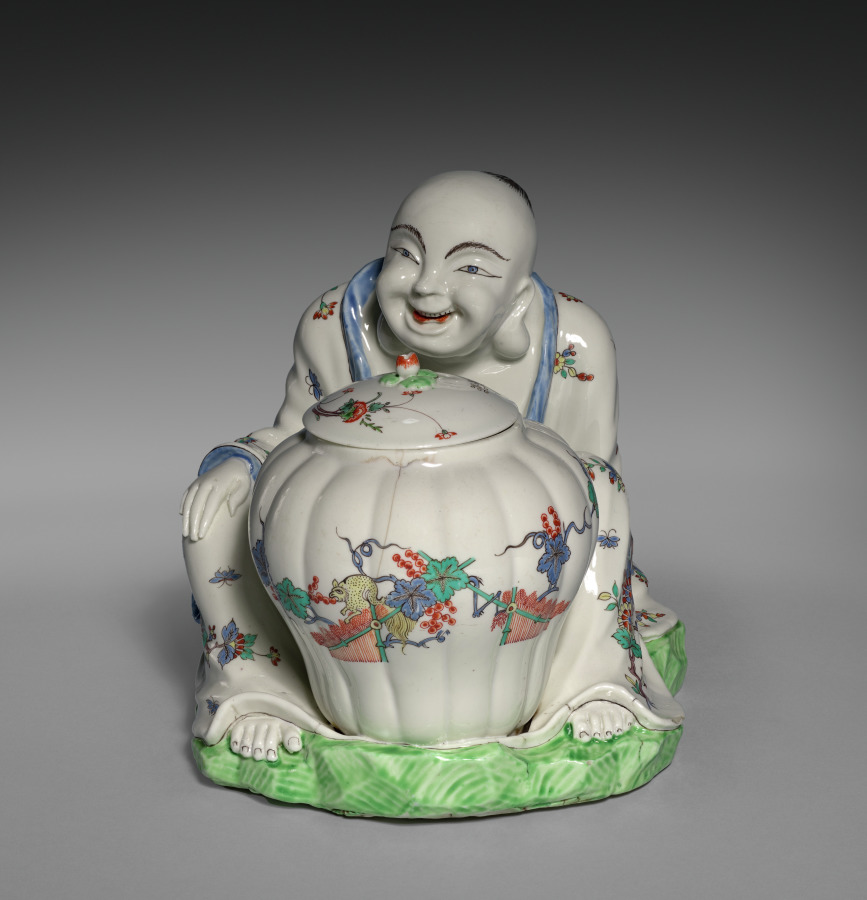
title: Figure of Budai or Hotei with Jar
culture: France, Chantilly, 18th century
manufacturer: Chantilly Porcelain Factory (French)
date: c. 1735–40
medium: Tin-glazed soft-paste porcelain with enamel decoration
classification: Ceramic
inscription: [Mark of the Chantilly factory (red hunting horn), on bottom]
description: The production of decorative figures like this one, referred to as magots or pagodes in European texts, was the result of an 18th-century European interest in Chinese and Japanese culture and porcelain. Budai, pronounced Hotei in Japanese, was a semilegendary Chinese monk known in Japan through the transmission of Chan Bhuddism. This figure’s decoration with multicolor overglaze enamels on a milky-white is typical of Japanese Kakiemon style.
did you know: In 1735, the Chantilly factory was given a 25-year royal privilege for the manufacture of objects that imitated Japanese porcelain.